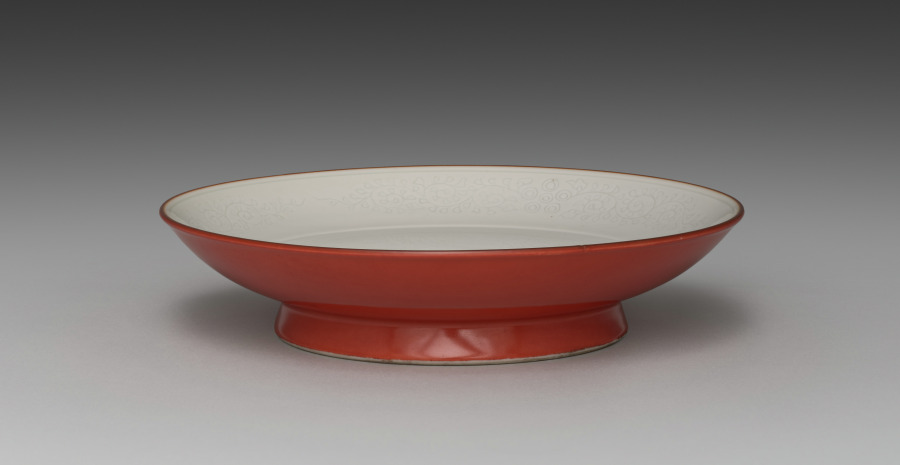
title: Dish with Carp in Waves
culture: Japan, Meiji period (1868–1912)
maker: Seifū Yohei III (Japanese, 1851–1914)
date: 1893–1914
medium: Porcelain with incised designs, iron oxide, and red glaze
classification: Ceramic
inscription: 清風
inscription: 清風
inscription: 清風盧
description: The exterior of this low, wide dish with flared foot is covered with a red coral glaze. Its interior is white with incised designs, and the rim is decorated with brown iron oxide. The primary design occupies the flat bottom of the bowl and is bound within a single band. It is of a carp swimming vigorously against roiling waves with frothy crests moving in multiple directions; the water just above the fish’s head is beginning to form a whirlpool. A closer look at the fish’s face reveals that it somewhat resembles that of a dragon. It is possible that the motif is meant to be a carp who jumps over the waterfall and transforms into a dragon, who flies into the sky. The iconography symbolizes the transformative experience of striving to one’s utmost and achieving the impossible against tough odds. Originating in China, the narrative’s visual representation as well as its meaning crossed the ocean to Japan, where it often appeared on items gifted to those celebrating pivotal successes in life, such as obtaining elevated status in one’s work or graduating from an academic program.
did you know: The inside walls of the bowl are decorated with three abstract flowers, each represented with five circles ringing a central circle, from which leafy tendrils stretch in both directions .